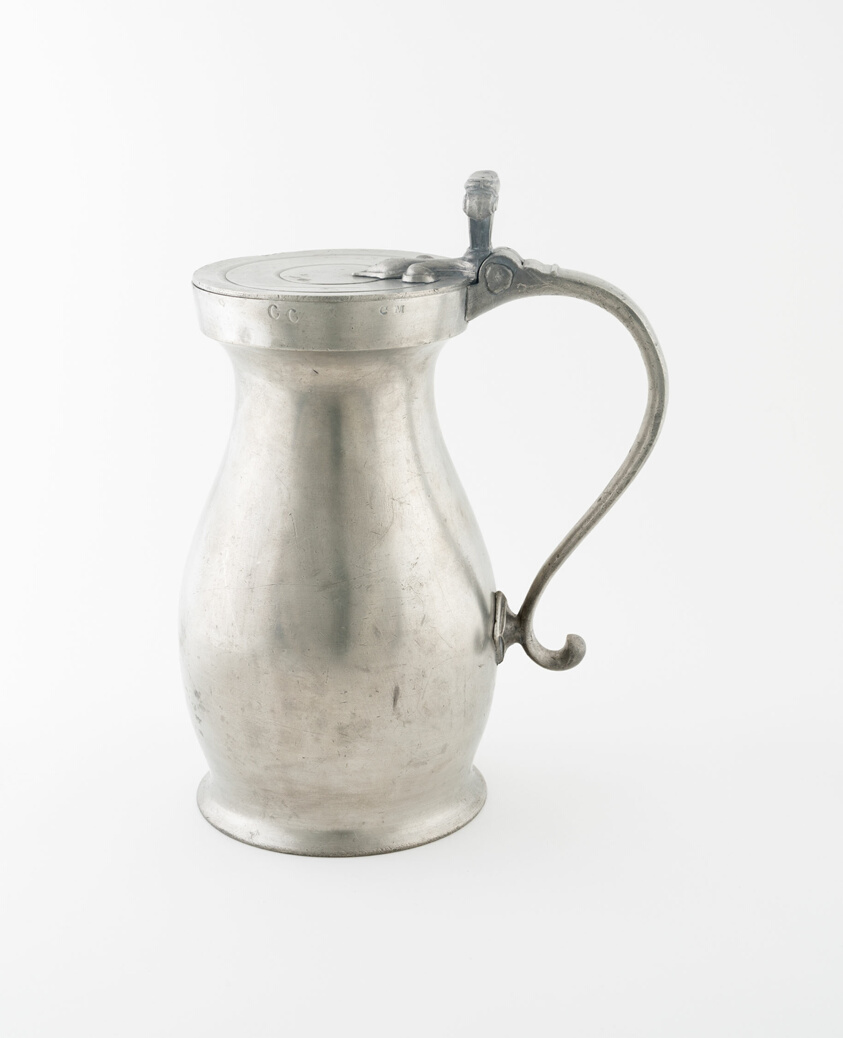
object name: Metalwork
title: Gallon Wine Measure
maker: England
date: c. 1780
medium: Pewter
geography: England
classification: drinking vessel; pewter; metalwork; european decorative arts